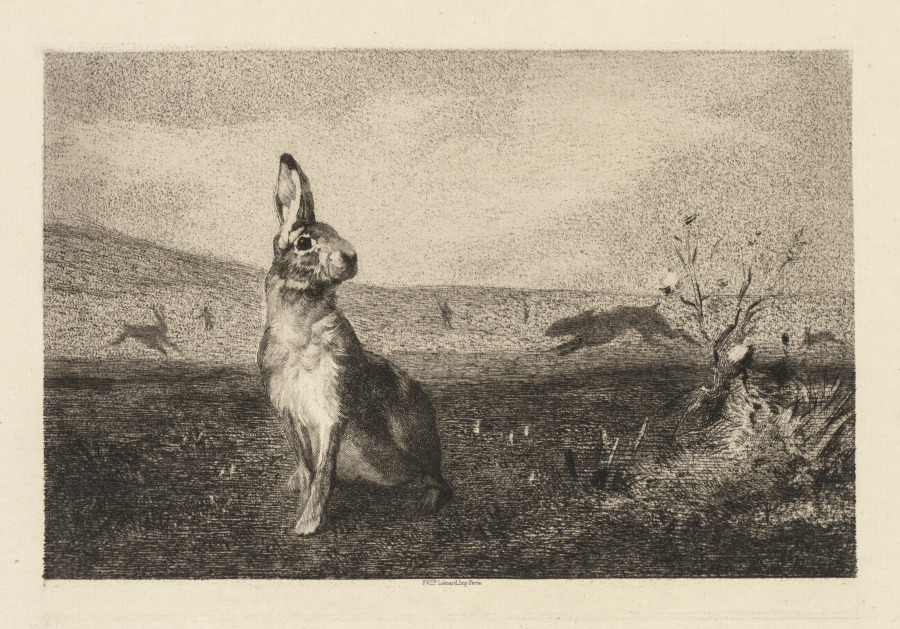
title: The Hare (Le Lièvre)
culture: France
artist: Félix Bracquemond (French, 1833–1914)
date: 1865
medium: Soft-ground etching and drypoint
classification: Print